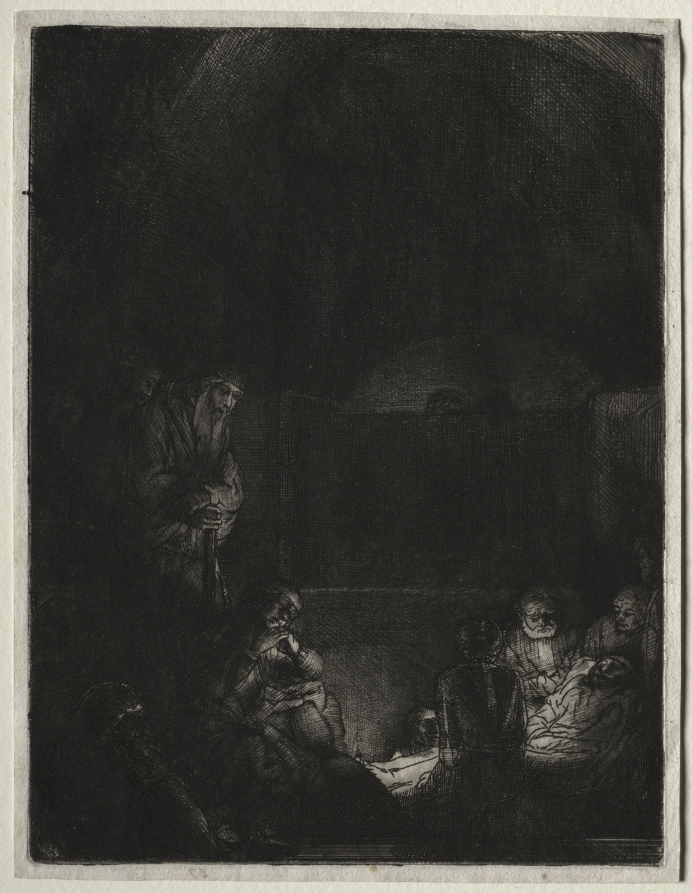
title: The Entombment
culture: Netherlands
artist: Rembrandt van Rijn (Dutch, 1606–1669)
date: c. 1654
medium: etching, drypoint and engraving with surface tone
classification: Print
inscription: VERSO, lower center, in graphite: W 91 ; lower left, in graphite: 50279 ; lower center, in graphite: B 86. ; lower right, in graphite: 21 · 11 · 6 ; lower right, in pen and brown ink: 87 ; lower right, in graphite: NS11- ; lower right, in graphite: Py[sor?] ; lower right, in graphite: Nlnli